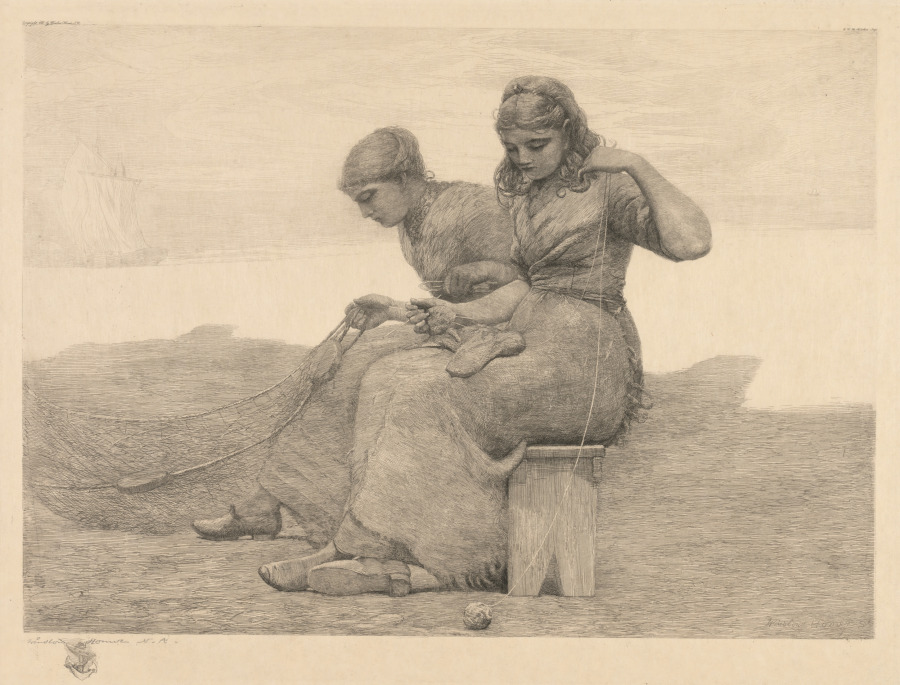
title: Mending the Tears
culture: America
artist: Winslow Homer (American, 1836–1910)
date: 1888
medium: etching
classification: Print